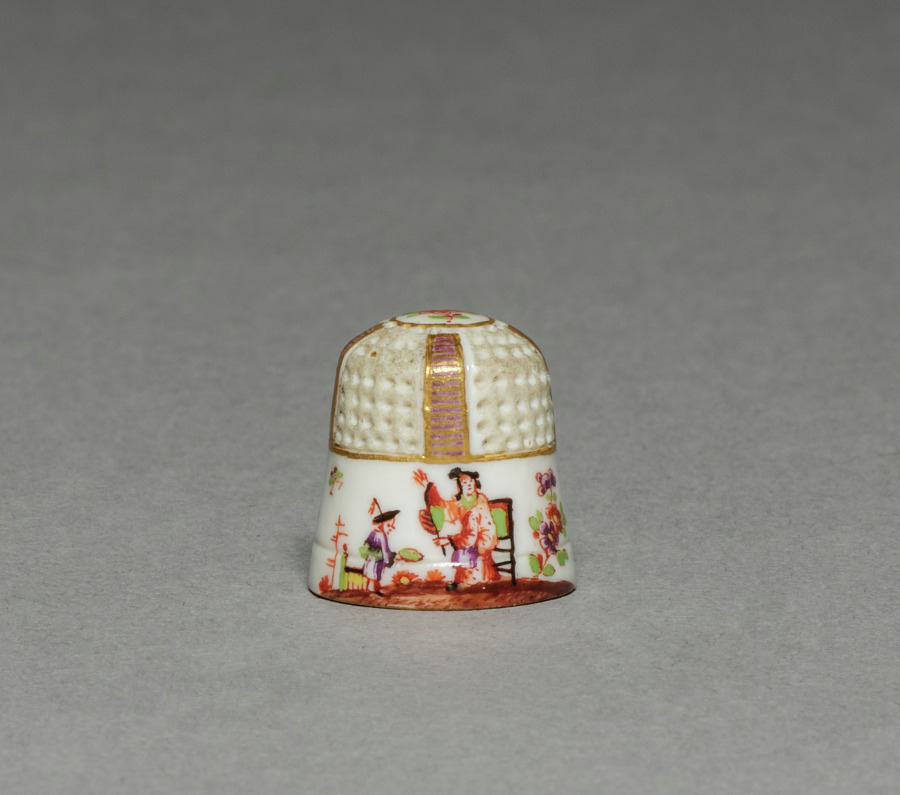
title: Thimble and Container (Thimble)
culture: England, mid-18th century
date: mid-18th century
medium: enamel on metal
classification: Enamel